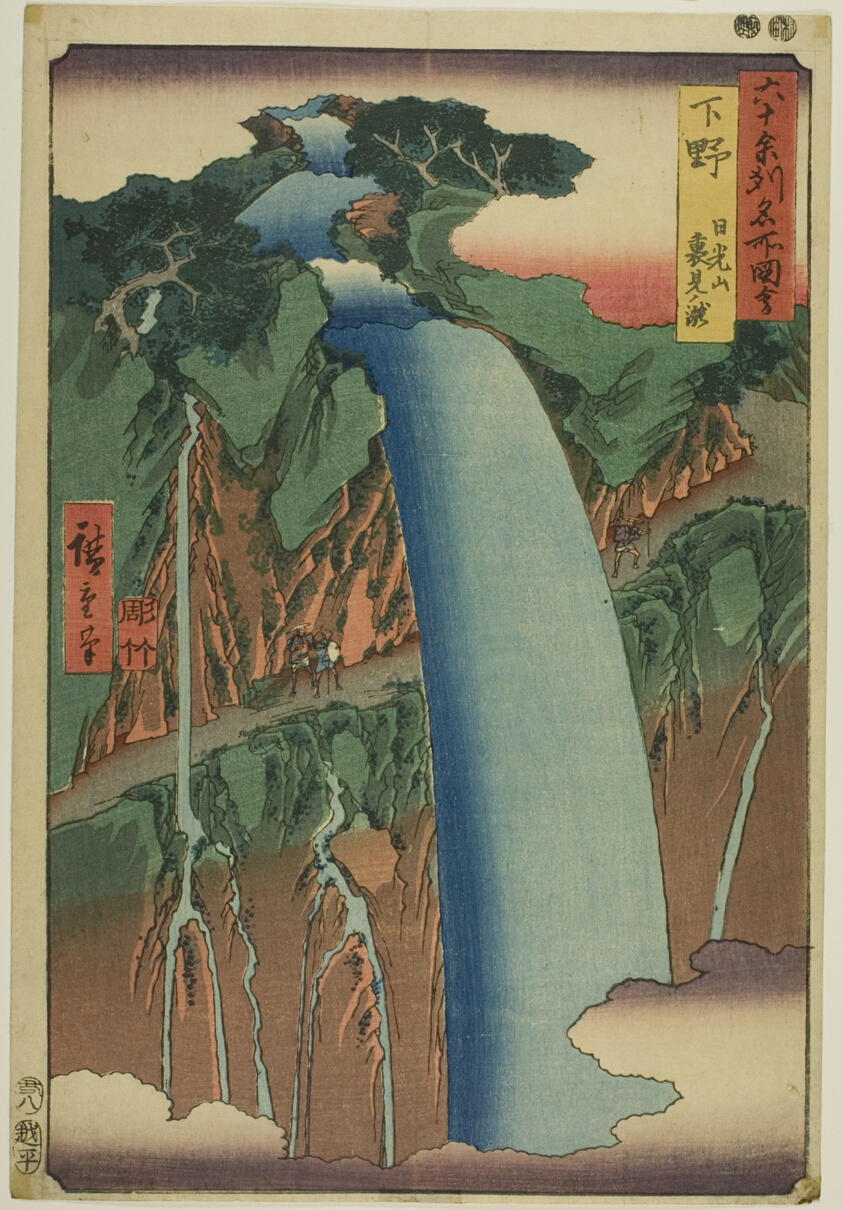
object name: Print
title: Shimotsuke Province: Urami Waterfall in Mount Nikko (Shimotsuke, Nikkosan Urami no taki), from the series "Famous Places in the Sixty-odd Provinces (Rokujuyoshu meisho zue)"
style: Japanese (culture or style)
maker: Utagawa Hiroshige 歌川 広重; Japanese, 1797–1858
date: 1853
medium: Color woodblock print; oban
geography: Japan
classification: woodblock print; print